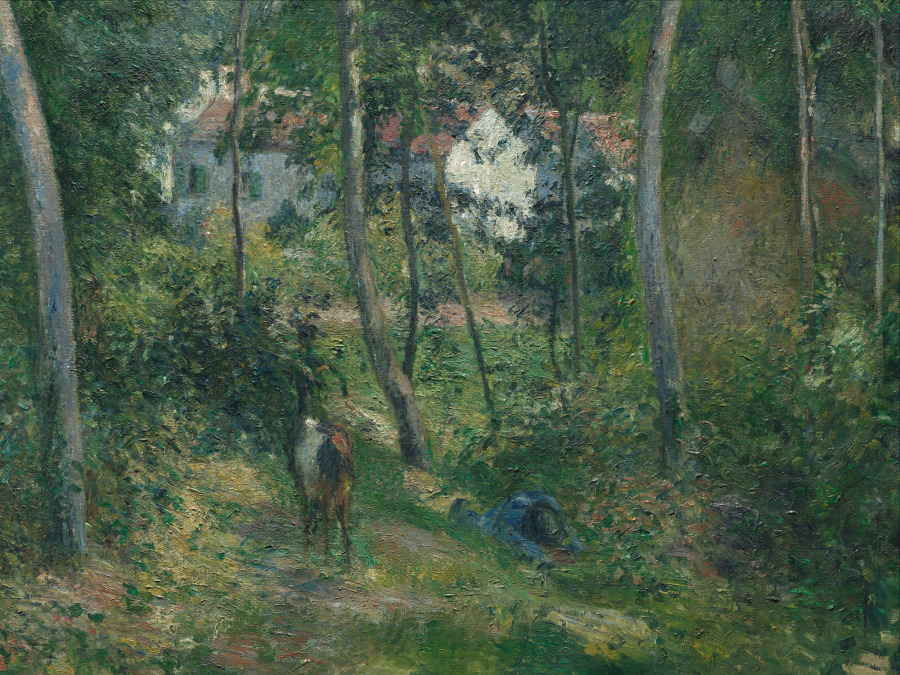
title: Edge of the Woods Near L'Hermitage, Pontoise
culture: France, 19th century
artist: Camille Pissarro (French, 1830–1903)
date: 1879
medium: oil on fabric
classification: Painting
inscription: Signed lower left: C. Pissarro 79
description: Born to a French-Jewish family on St. Thomas island in the Caribbean, Pissarro painted this monumental landscape when he was desperately poor and struggling to sell his paintings. It depicts a man slumbering in the sun-dappled backwoods of the Hermitage, a rural village near Pontoise, where the artist had been living since 1872. Restricting his palette to pure hues, Pissarro applied brushstrokes in systematic diagonal patterns, producing an effect that he likened to knitting. This canvas was included in the fourth Impressionist exhibition of 1879.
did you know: A goat seen from the back standing next to the figure in blue laying in the grass invites the viewer to step inside this serene and beautiful setting.